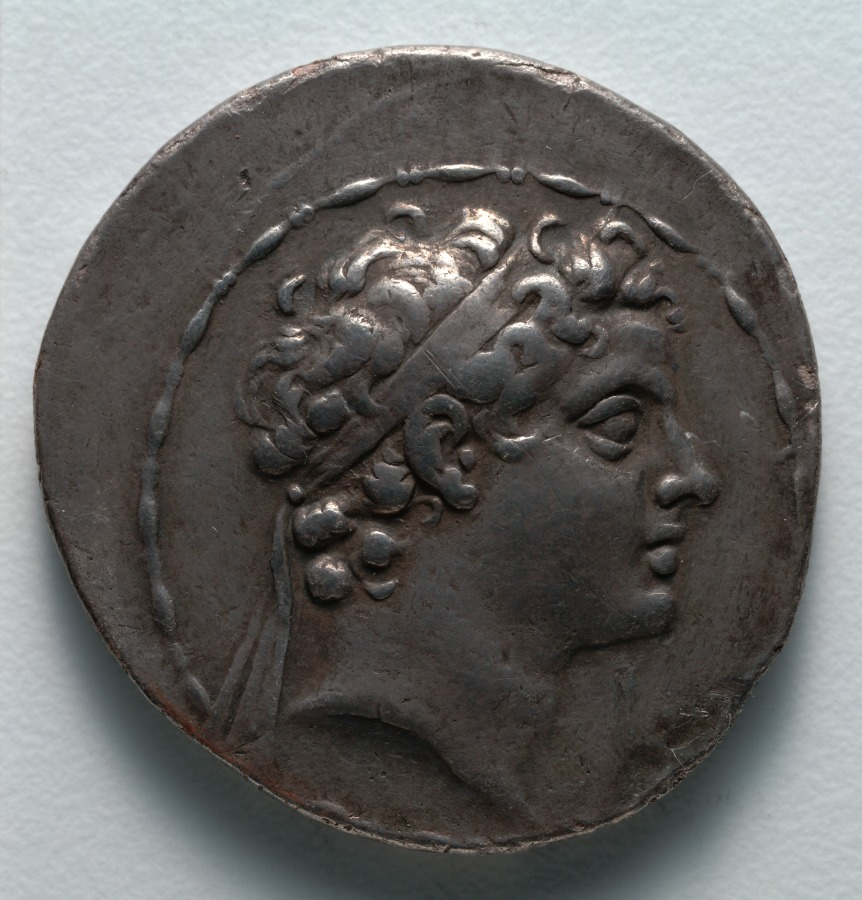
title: Tetradrachm: Head of Antiochos V (obverse); Zeus (reverse)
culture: Greek, Seleukid, minted at Antioch (Syria), reign of Antiochos V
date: 164–162 BCE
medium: silver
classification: Coins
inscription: ΒΑΣΙΛΕΩΣ | ΑΝΤΙΟΧΟΥ | ΕΥΠΑΤΟΡΟΣ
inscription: Τ within Π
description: Thrust into power while still a child, Antiochos V used coinage to legitimize his tenuous control. On the obverse of this coin, Antiochos appears like many Hellenistic kings, with heavy hair curls and a diadem. On the reverse, a seated Zeus holds the goddess of victory, Nike, who crowns Antiochos’s name with a wreath, confirming his divine right to rule.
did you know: Antiochos V’s boyish portrait reflects his accession to the Seleucid throne at 9 years of age.